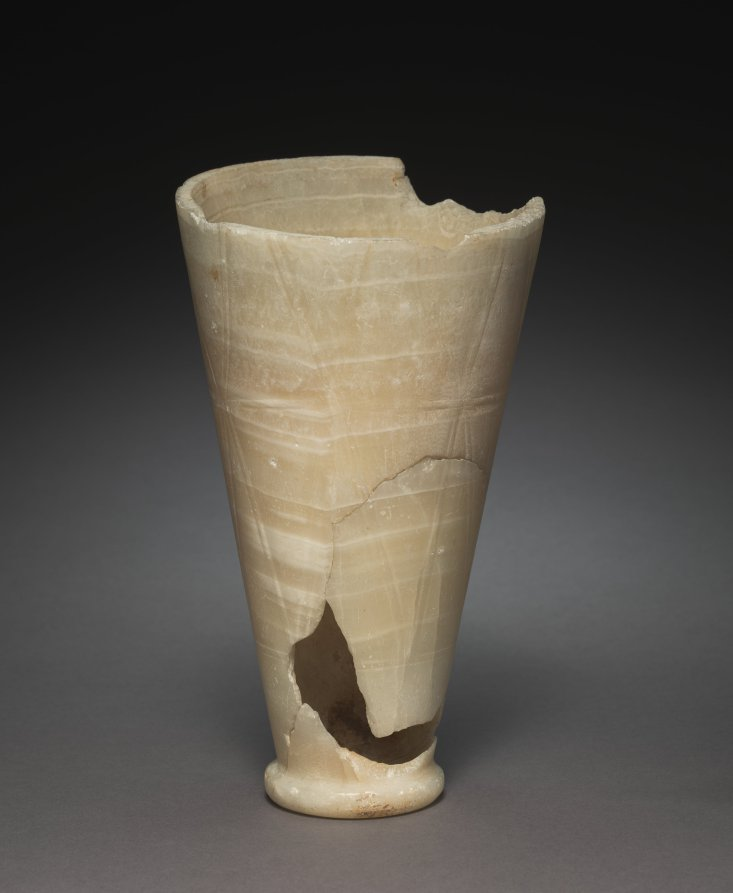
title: Tall Jar with Rope Patterns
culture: Egypt, Saqqara, north of the Step Pyramid, tomb 2305, excavations of J. E. Quibell, 1910-1911, Old Kingdom (2647–2124 BCE), Dynasty 3, reign of Djoser (c. 2650 BCE)–reign of Sneferu (2613–2589 BCE)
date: 2647–2454 BCE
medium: travertine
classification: Vessels